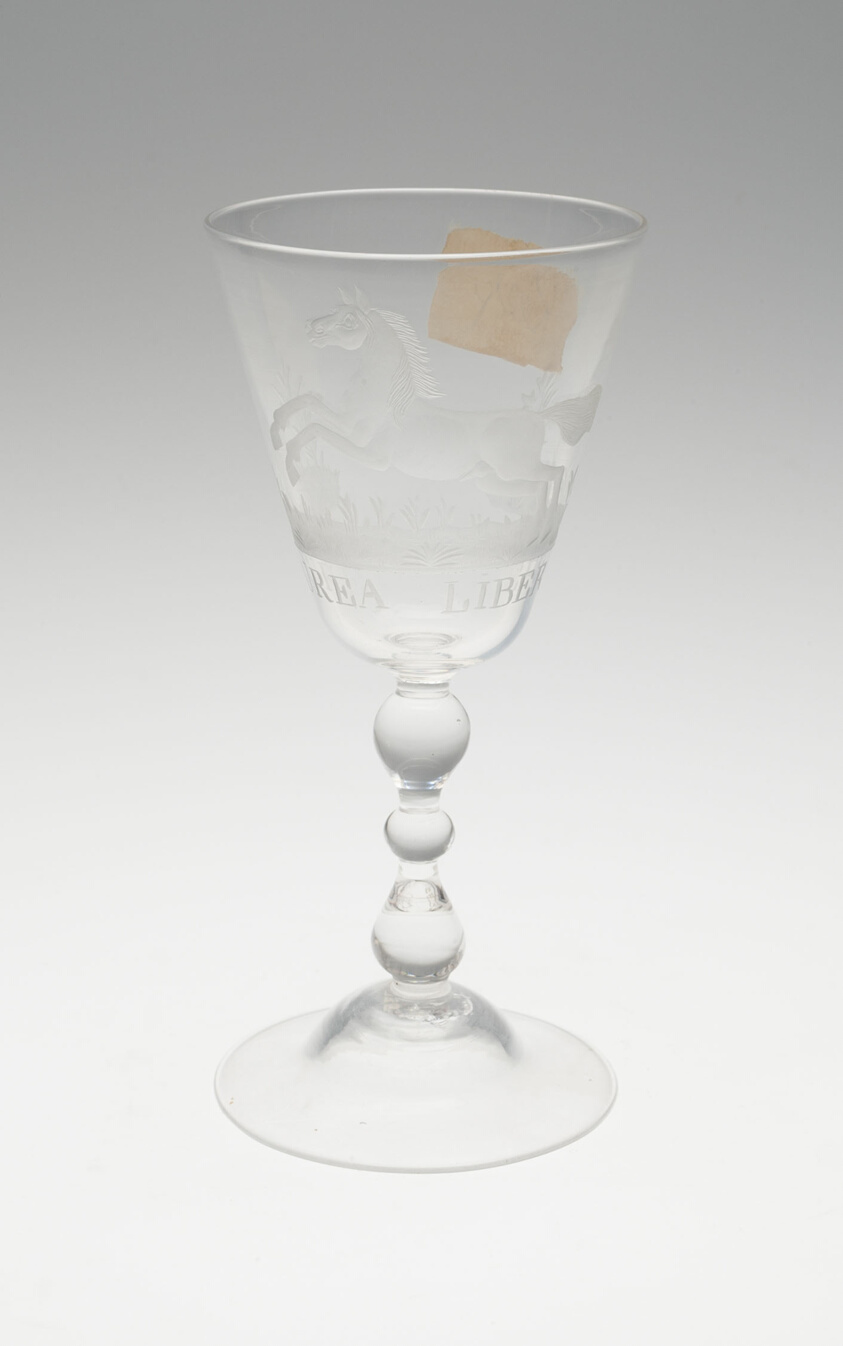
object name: Glass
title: Wine Glass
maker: England or Netherlands (glass); Netherlands (engraved)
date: 18th century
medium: Glass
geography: Netherlands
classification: drinking vessel; glass; european decorative arts